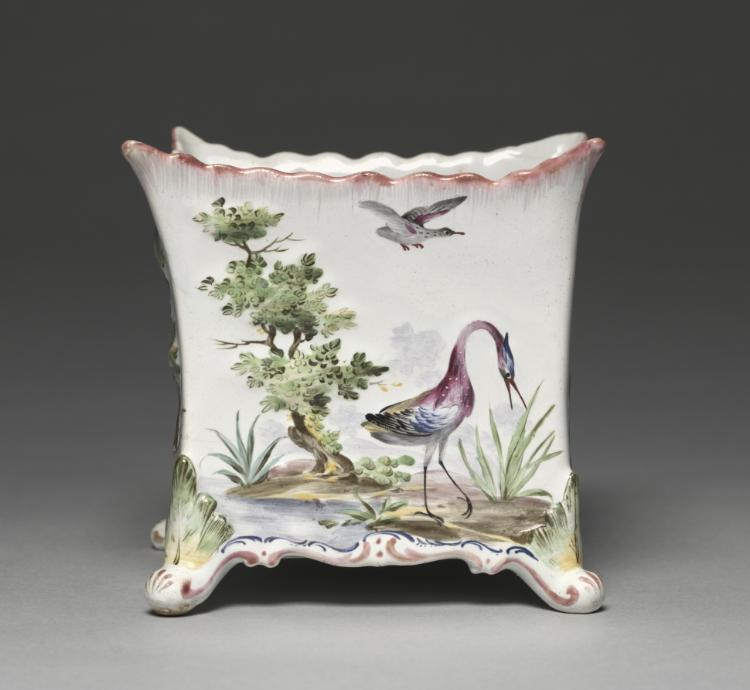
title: Flower Container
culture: France, 18th century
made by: Sceaux Factory (French, active 1748–66)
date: c. 1765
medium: faience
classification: Ceramic